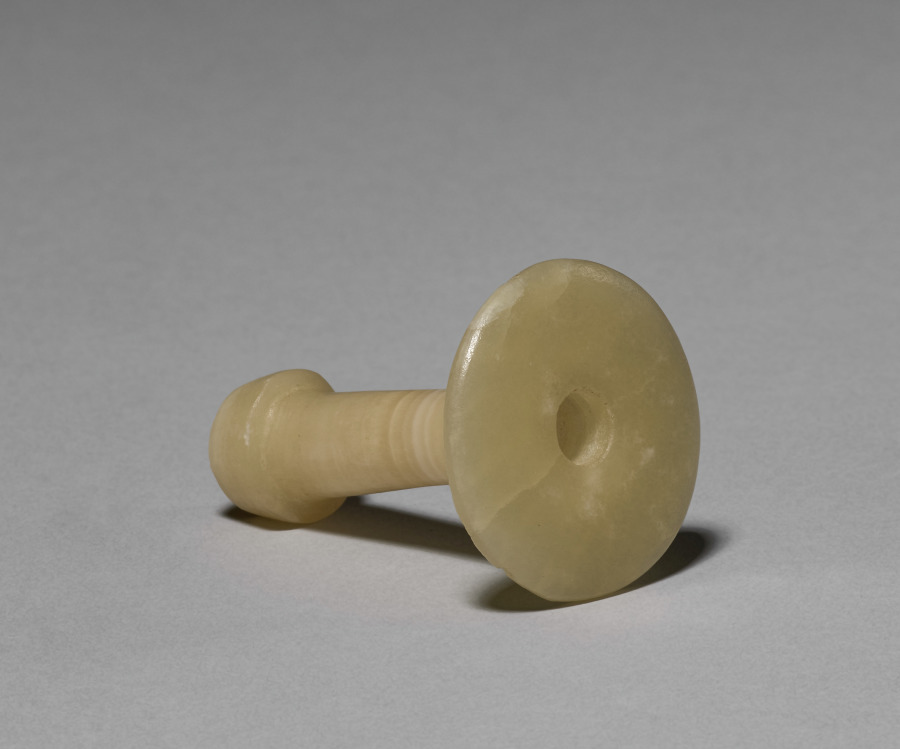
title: Alabastron (stopper)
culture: Egypt, Greco-Roman period (332 BCE–395 CE), Ptolemaic dynasty (305–30 BCE)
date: 305–222 BCE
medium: travertine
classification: Vessels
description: Both ancient Egyptian men and women loved cosmetics. Unguents, oils, and perfumes made from aromatic plant resins and gums were obtained at great cost from distant lands. The objects identified with cosmetics were given lavish treatment.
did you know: This is the lid to a perfume holder which might have been attached to a string, making it easily portable.